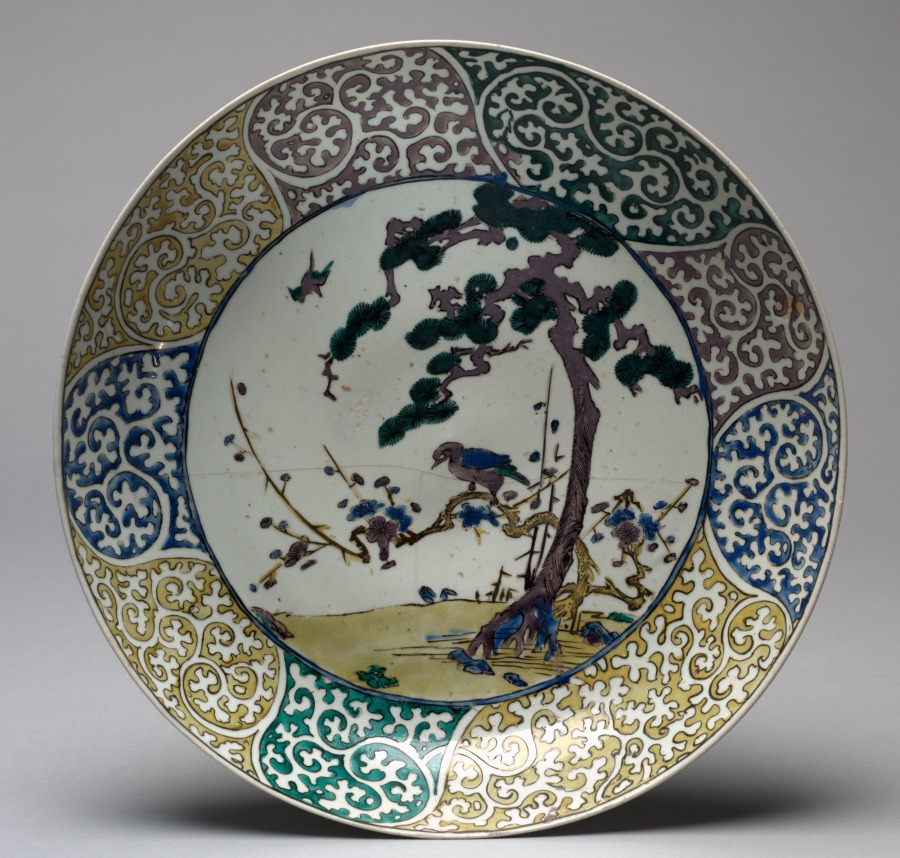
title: Plate with Bird and Flower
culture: Japan, Meiji period (1868–1912) or Taishō period (1912–26)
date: early 1900s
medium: Porcelain with overglaze enamel (Ko-Kutani revival style)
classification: Ceramic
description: This dish is a sophisticated example of later ceramists reinterpreting earlier styles of Japanese porcelain. The colors and patterns used look similar to some works produced on the island of Kyushu in the1600s and 1700s. However, the idea to combine alternating blocks of yellow, green, purple, and blue with a "Chinese grasses" (karakusa) pattern around the rim of the dish is one hit upon in the early 1900s by an artist familiar with the colors and patterns of earlier works.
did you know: Porcelain must be fired at a high temperature to achieve its strength and semitranslucent surface.